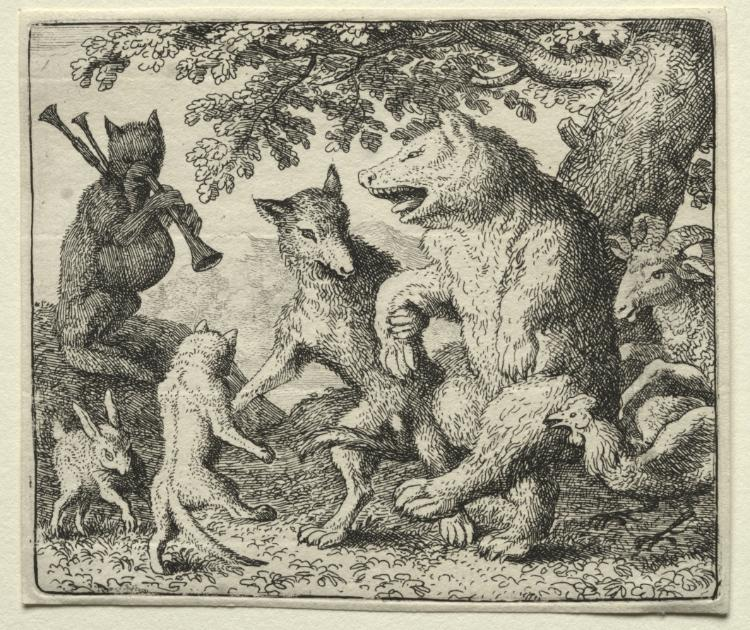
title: Reynard the Fox: The Wolf and the Bear Celebrate Their Freedom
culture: Netherlands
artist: Allart van Everdingen (Dutch, 1621–1675)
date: 1650–75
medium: etching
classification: Print